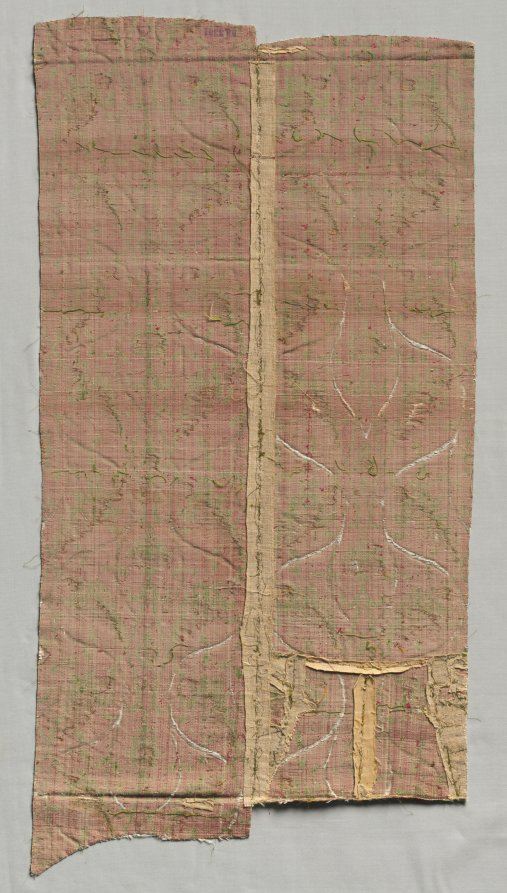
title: Two-color Velvet with Gold in a Double Curved Lattice Pattern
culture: Italy, possibly Florence, 15th century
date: 1450–1500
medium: silk, gold thread; polychrome velvet: cut pile, brocaded, and voided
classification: Velvet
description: Although plain velvets were woven in Italy by the end of the 13th century, polychrome-patterned velvets were not produced until the late 14th century. This velvet with two colors of pile incorporates a limited amount of costly gold thread while a fourth color, ivory, is formed by the satin weave of the foundation, called voided velvet. Palmette leaves composed of gold thread and crimson pile dominate the pattern on the green pile ground. The palmettes are arranged in an overlapping curved layout, popular in Italy and in Ottoman Turkey during the second half of the 15th century.